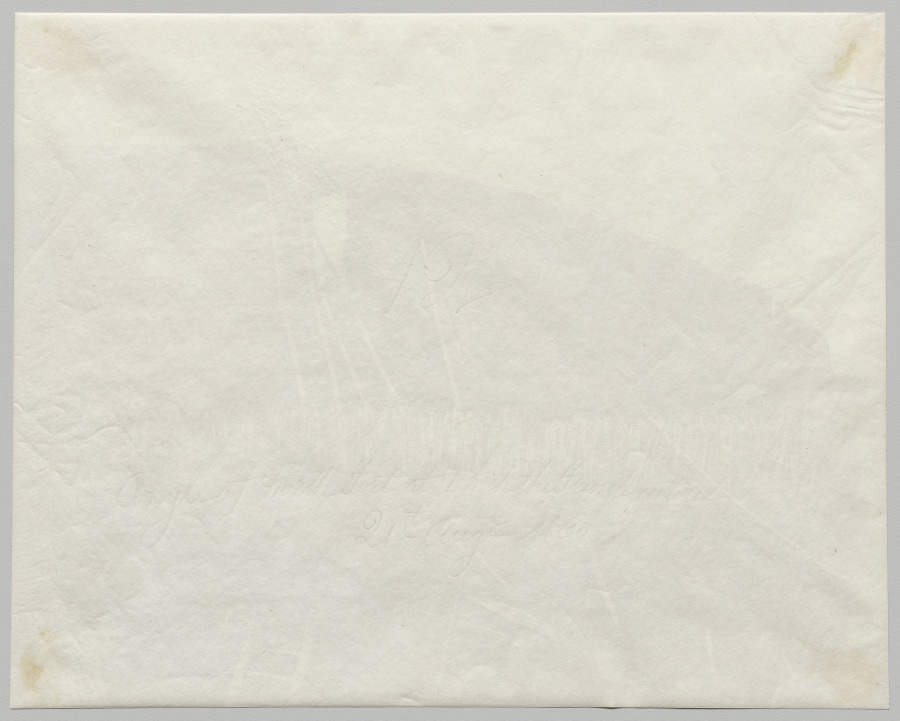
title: Angle of Taku Fort at which the French entered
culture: England, 19th century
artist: Felice A. Beato (British, 1832–1909)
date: 1860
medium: albumen print from collodion negative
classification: Photograph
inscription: Pencil impression on verso: “[illegible under regular lighting]/21st August 1860”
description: Beato’s photographs of the Second Opium War are believed to be the first that captured a military campaign in progress. Within that project, an extended sequence of photographs of the Taku Forts—to which this image belongs—exemplify the idea of creating a narrative recreation of the battle, a process that would later be followed by American photographers documenting the Civil War.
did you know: Felice Beato was one of the pioneers of war photography.